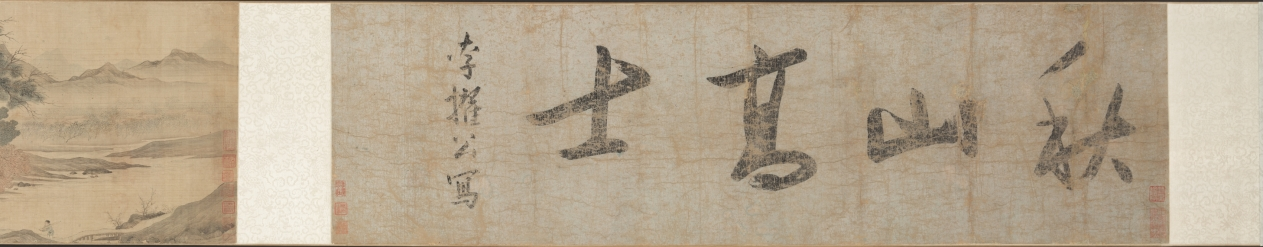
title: Scholar-Hermits in the Autumn Mountains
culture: China, Ming dynasty (1368–1644)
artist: Tang Yin (Chinese, 1470–1523)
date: 1500–1510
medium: handscroll, ink and light color on silk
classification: Painting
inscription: Artist's signature and 2 seals at end of scroll: Tang Yin [seals] T'ang Po-hu; T'ang Tzu'wei t'u-shu.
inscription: Title on frontispiece by Li Cho-kung (dates unknown).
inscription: 1 colophon and 11 additional seals: 1 colophon dated 1915 of Wu Tso-hsi (19th-20th c.); 2 seals of Gao Qifeng 高奇峰 (1889–1933); 5 seals of C. C. Wang 王季遷 (1907–2003); 4 seals unidentified.